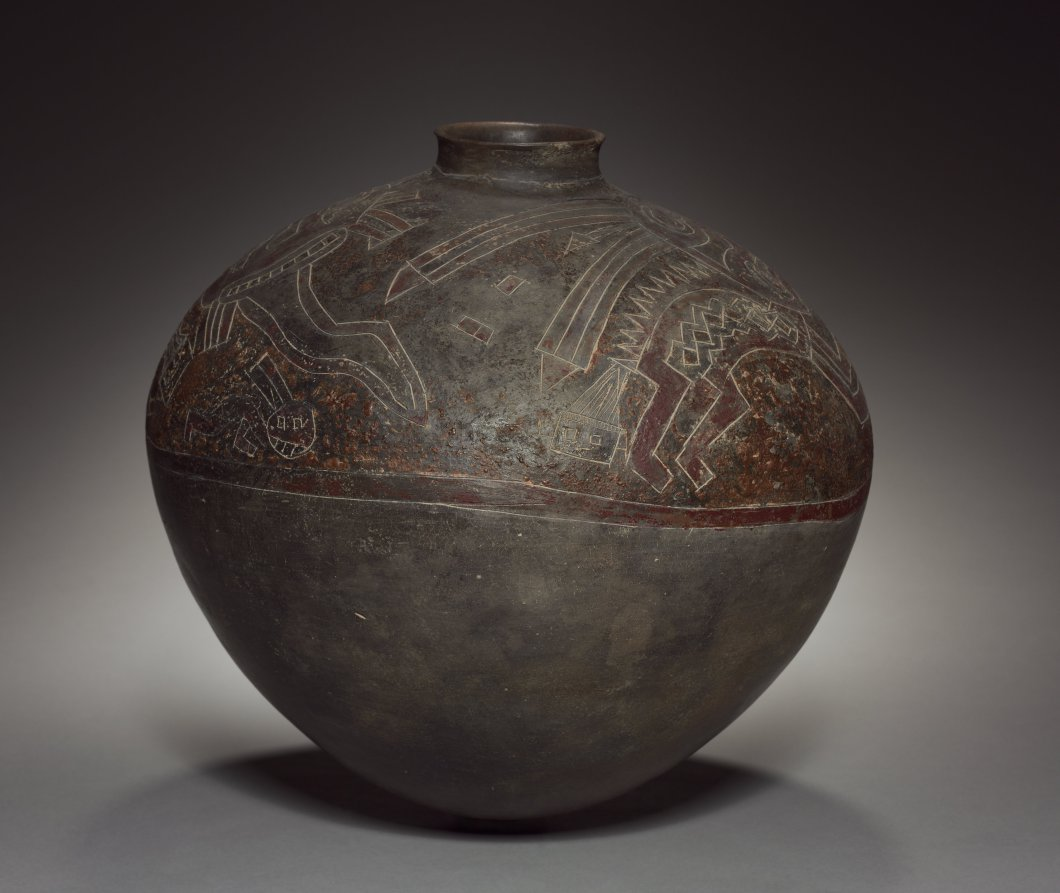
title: Vessel with Oculate Being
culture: Peru, South Coast, Paracas (Cavernas) style (700 BCE–1 CE)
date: 300 BCE–1 CE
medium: earthenware with resin-based paint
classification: Ceramic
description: A supernatural creature known today as the Oculate Being, after its huge eyes, became prominent late in Paracas times. The Paracas left no written records and this creature's meaning is poorly apprehended, but it clutches a severed human head by the hair. A hint of the head's significance comes from the Oculate Being itself, whose head sprouts streamers that may represent abstract energy or force. The severed head cult, then, may have aimed at capturing and redirecting this energy. (Other Paracas objects appear nearby.)